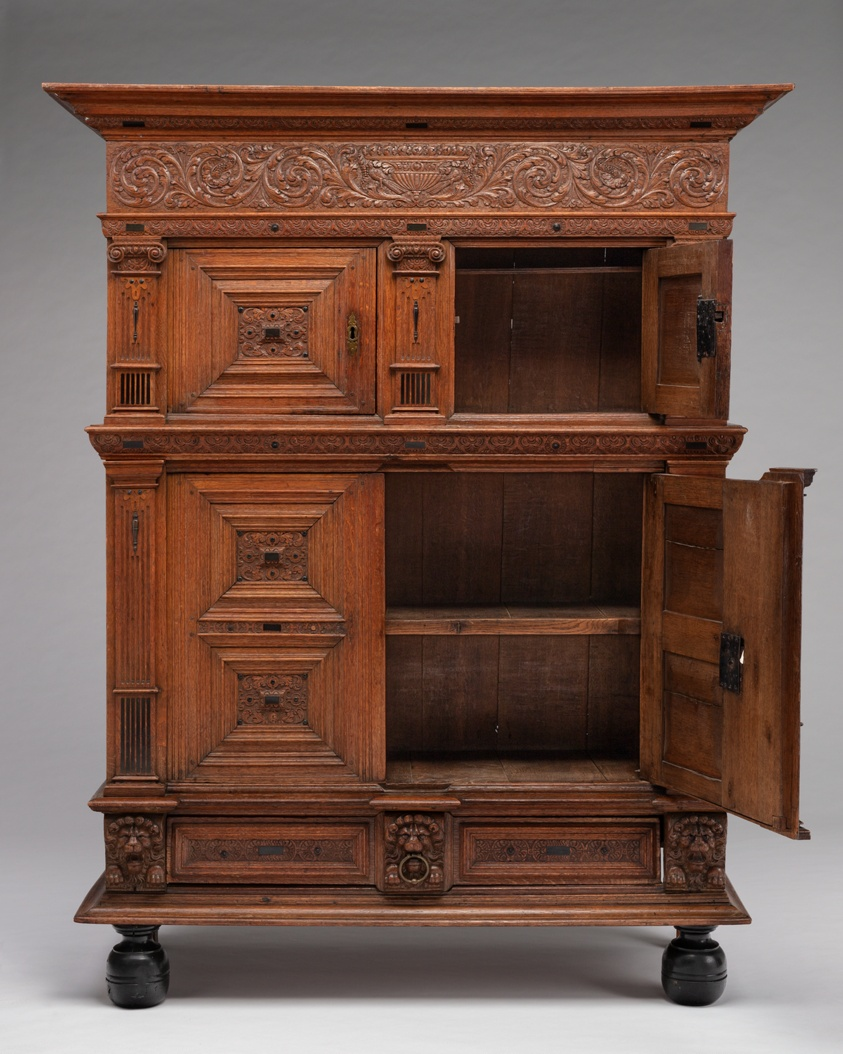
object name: Furniture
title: Linen Cupboard (Kast)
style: Baroque, Mannerism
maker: The Netherlands, probably Amsterdam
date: 1630/50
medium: Oak, pearwood, hardwood, paint, iron, and brass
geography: Netherlands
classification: furniture; decorative arts; functional object; furnishings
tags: lions, animals, architecture